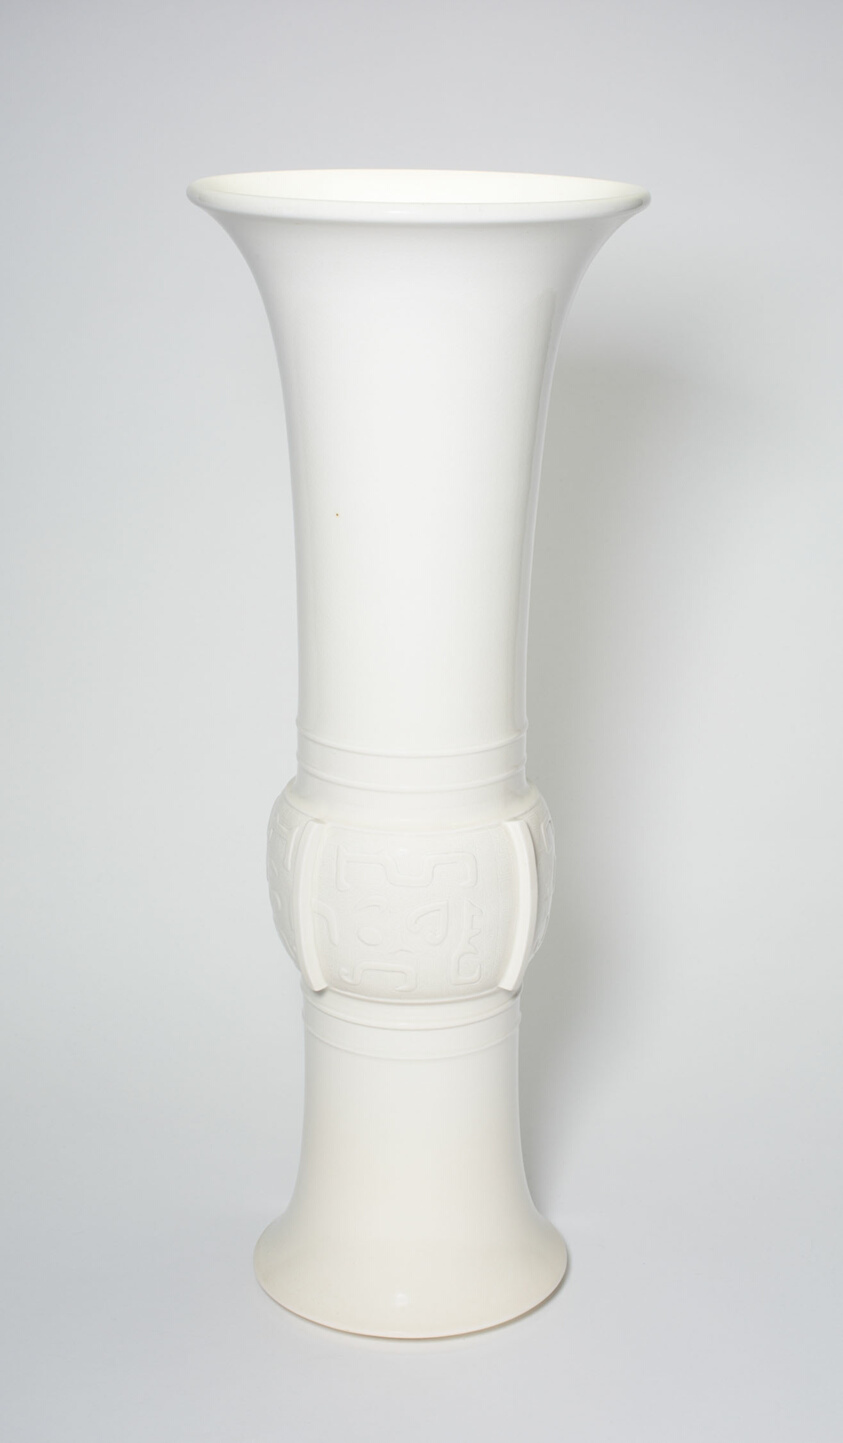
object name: Vessel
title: Beaker Vase in the Shape of an Ancient Bronze Beaker (Zun)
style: Chinese (culture or style)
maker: China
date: Qing dynasty (1644–1911), late 17th/early 18th century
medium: Dehua ware, Blanc-de-chine-type; porcelain with underglaze molded decoration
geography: China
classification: vase; porcelain; vessel; asian art; ceramics